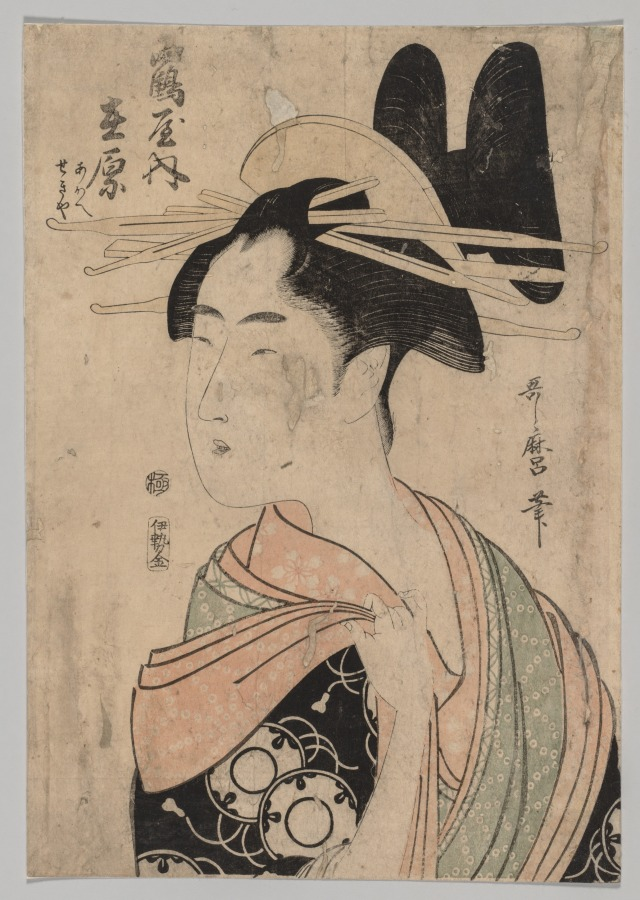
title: Woman of the Yoshiwara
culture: Japan, Edo period (1615–1868)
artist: Kitagawa Utamaro (Japanese, c. 1754–1806)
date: 1753–1806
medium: color woodblock print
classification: Print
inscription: Signature: Utamaro fude